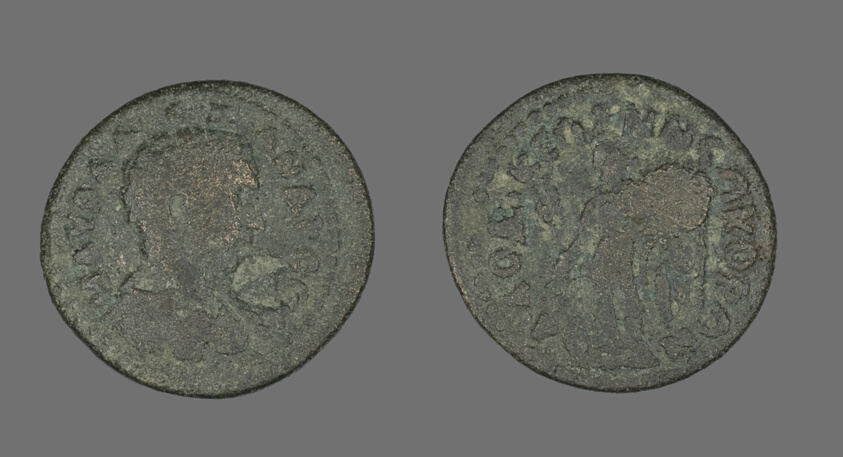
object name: Coin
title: Coin Portraying the Emperor Severus Alexander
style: roman (ancient, style or period)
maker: Roman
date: before 222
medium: Bronze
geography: Roman Empire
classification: coin; ancient art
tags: portrait